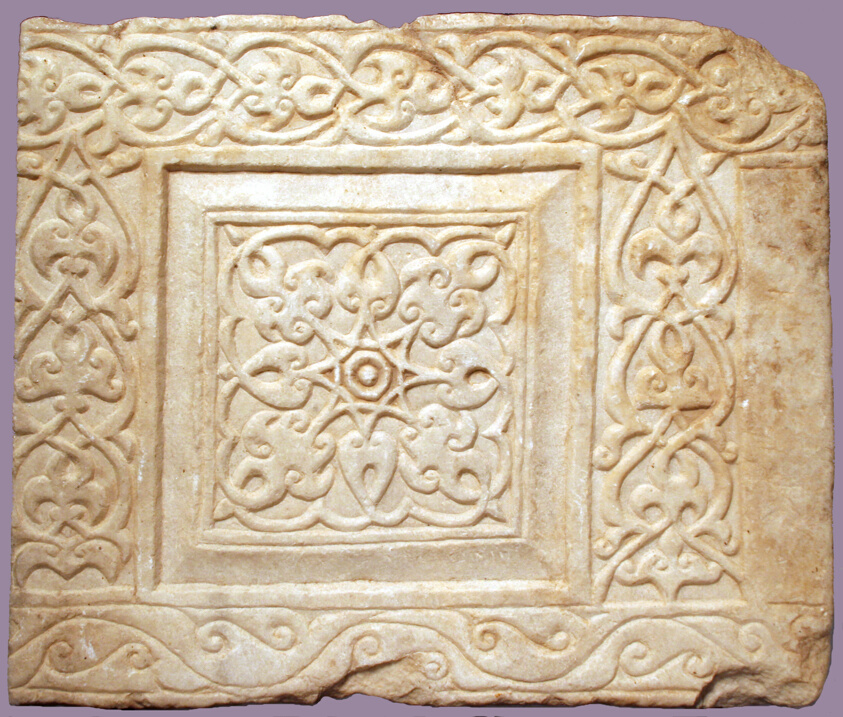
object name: Architectural fragment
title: Architectural Relief Panel with Foliage Design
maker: Afghanistan; Ghazni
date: Ghaznavid dynasty (977-1186), 12th century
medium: Carved marble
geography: Afghanistan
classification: marble; stone; architectural fragment; asian art